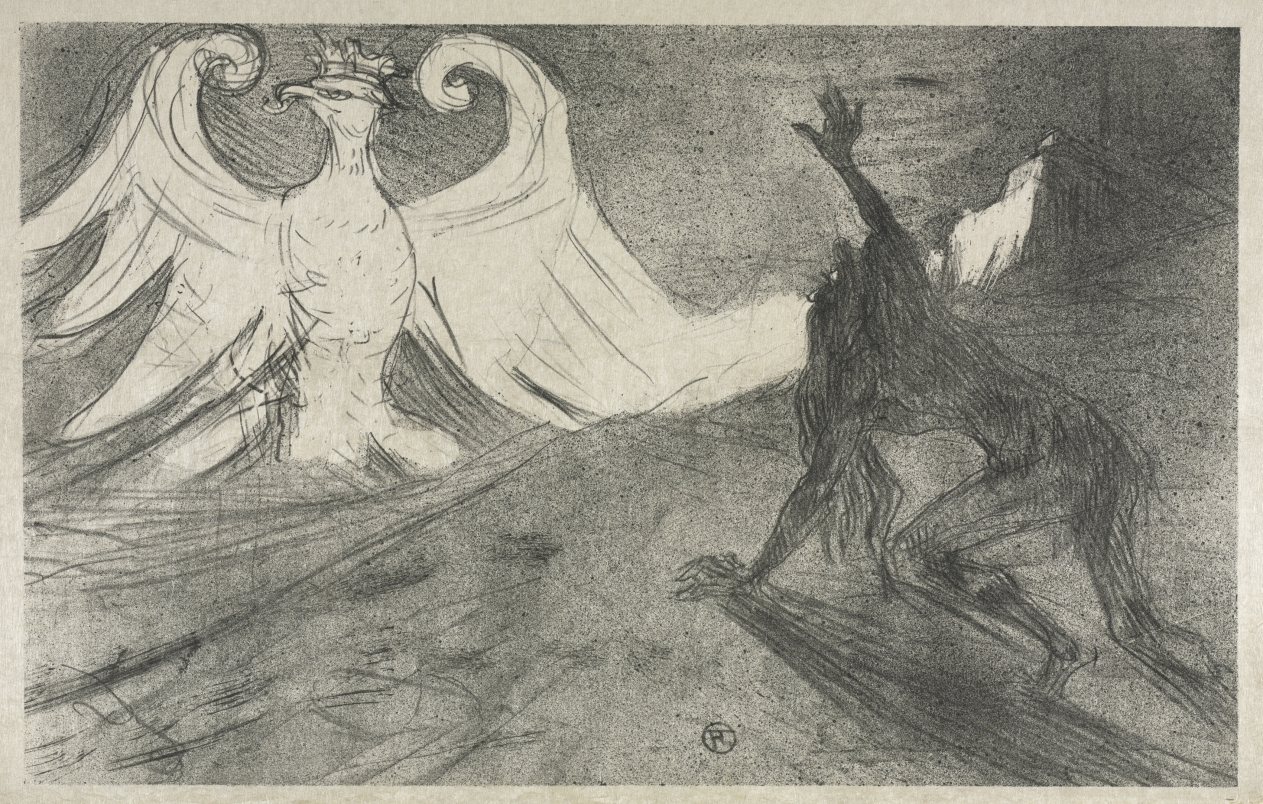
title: Project for Frontispiece to: Au pied du Sinaï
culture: France, 19th century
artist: Henri de Toulouse-Lautrec (French, 1864–1901)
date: 1898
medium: lithograph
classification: Print